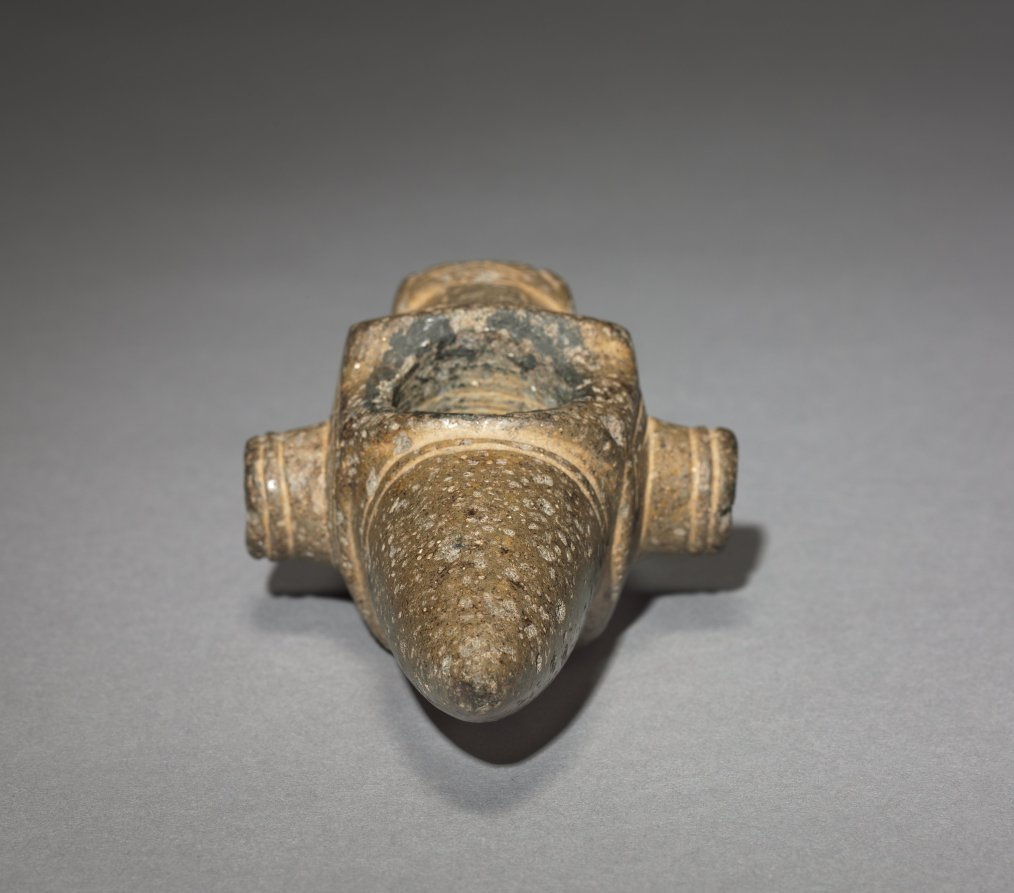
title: Mace Head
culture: Costa Rica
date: 300–500 CE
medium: pecked and polished gray stone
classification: Sculpture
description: Once mounted on wooden shafts, elaborately shaped mace (club) heads like this one probably were not used as weapons. Rather, they could have served as emblems of chiefly authority, group insignia, the heads of ceremonial weapons, or all three. They eventually were placed in elite graves. The back-curled nose on this example may refer to a crocodile or caiman.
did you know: In ancient Costa Rica, it was believed that the world rested on the back of a crocodile.